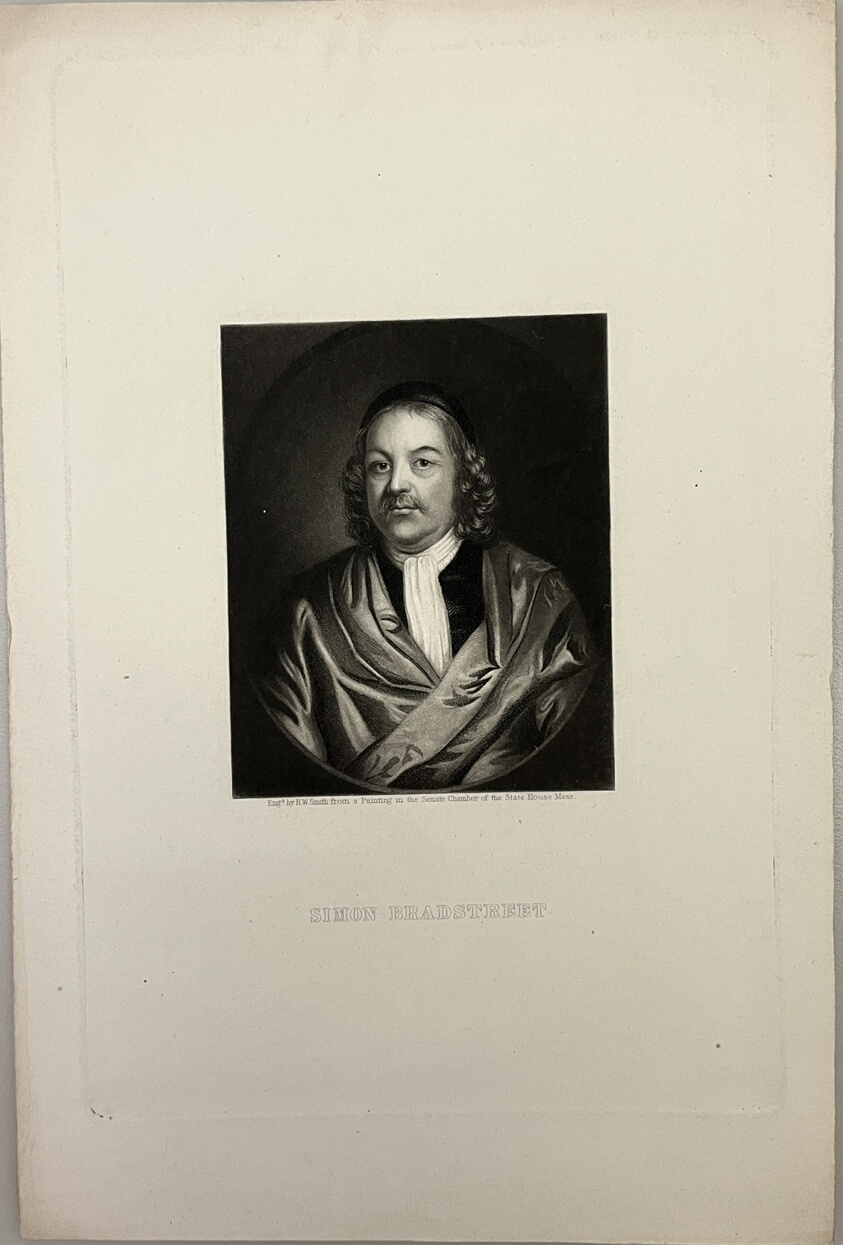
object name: Print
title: Simon Bradstreet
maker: Henry Wright Smith (American, active 1828); after Joseph Rodefer De Camp (American, 1858-1923)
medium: Steel engraving on paper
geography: United States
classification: reproduction; print; prints and drawing